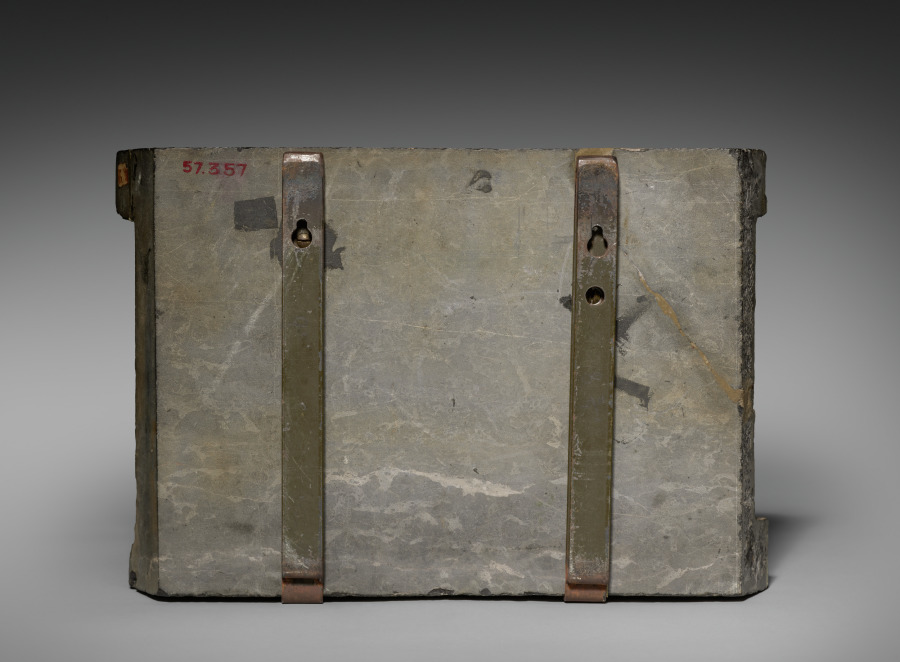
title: Monster Caryatid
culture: China, possibly from Xiangtangshan, Northern Qi dynasty (550–577)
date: late 500s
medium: Limestone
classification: Sculpture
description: This squatting monster with claws on its knees, braces its shoulders against an overhanging molding. The half-human, half-animal creature was likely part of a Buddhist cave-temple complex at Xiangtangshan, in Hebei Province, northwest China. Found in the lower registers of stone monuments of either architectural structures or statues of Buddhist deities, such monsters had a supportive function. Their scary appearance was believed to keep evil spirits away from the sacred sites.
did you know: The complex of Buddhist cave temples at Xiangtangshan, “Mountain of Echoing Halls,” is a central achievement of the Northern Qi period.